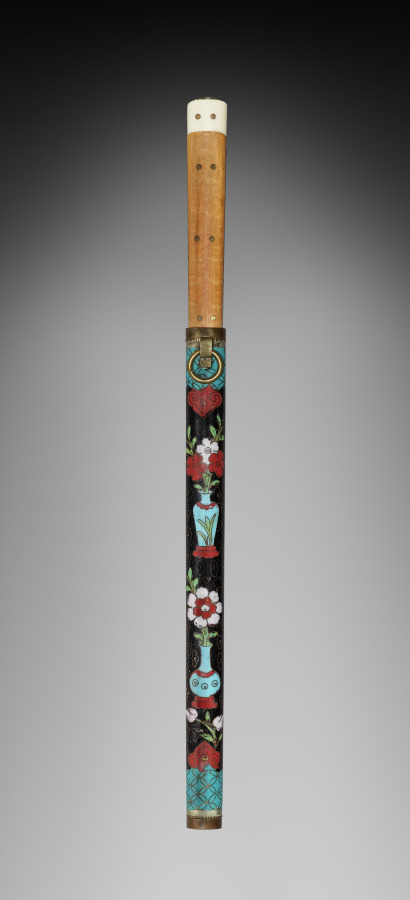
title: Kit with Chopsticks and Knife- Souvenir Trade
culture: Japan, Meiji period (1868–1912) to Taishō period (1912–26)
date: early 1900s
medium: enamel, wood, walrus ivory or bone, metal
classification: Implements